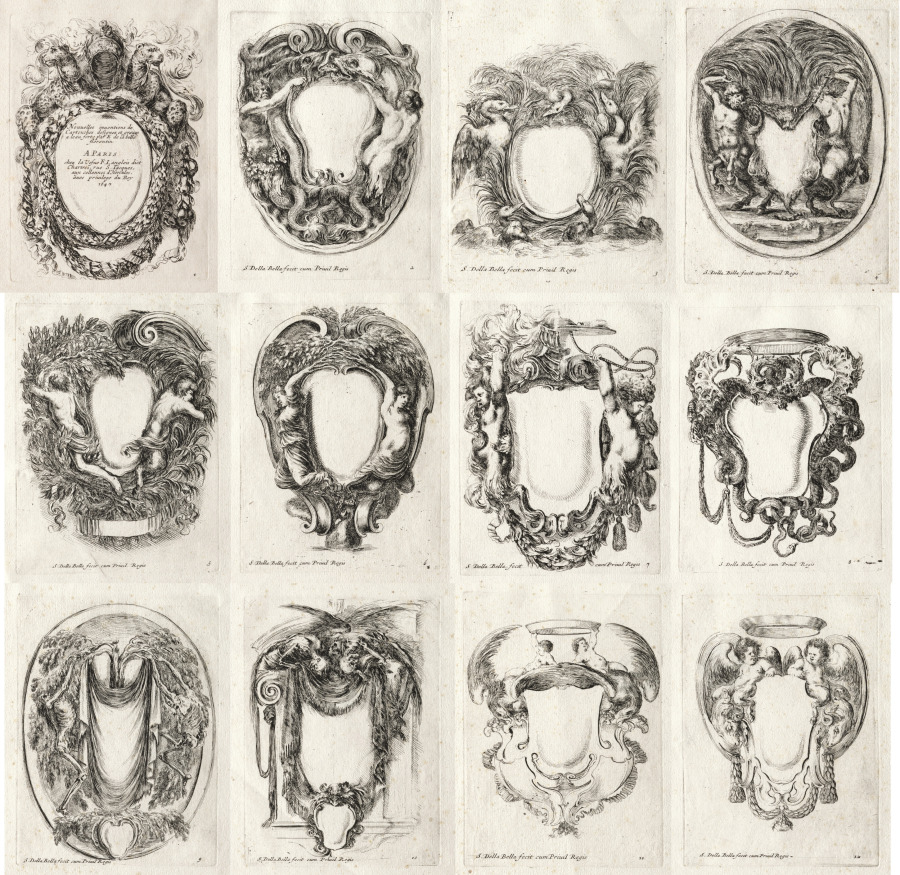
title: New Model for a Cartouche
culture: Italy, 17th century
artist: Stefano Della Bella (Italian, 1610–1664)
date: 1647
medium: etching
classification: Print